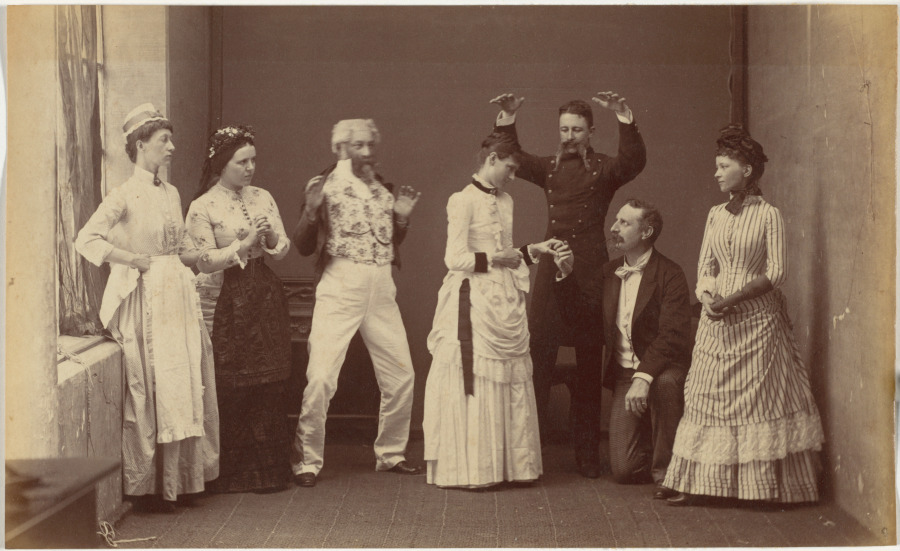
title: Fancy Ball, Indore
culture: India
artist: Raja Deen Dayal (Indian, 1844–1905)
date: 1886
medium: albumen print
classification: Photograph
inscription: Stamped in black ink on verso: “23.7.F” Written in pencil on verso: “2765”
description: Entertainments at “fancy dress” or costume parties often included amateur theatricals or tableaux vivants—static scenes drawn from literature, history, or artworks. Here, Deen Dayal captured three moments distilled from a popular novel or play. The guests—all middle or upper class—perform as characters ranging from the working class to ladies and gentlemen. Because the photographic technology of the time required strong daylight, the photographs would have been made on a separate occasion, not at the party.